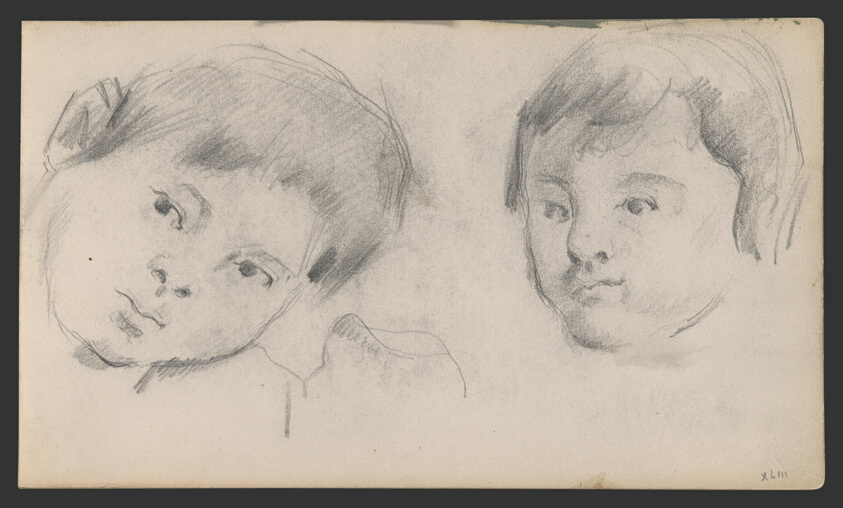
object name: Drawing and Watercolor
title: Sketchbook No. 2 (L'Estaque)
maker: Paul Cézanne; French, 1839-1906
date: 1875–86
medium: Graphite and pen and ink drawings on paper, bound into a book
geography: France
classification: sketchbook; graphite; prints and drawing; paper